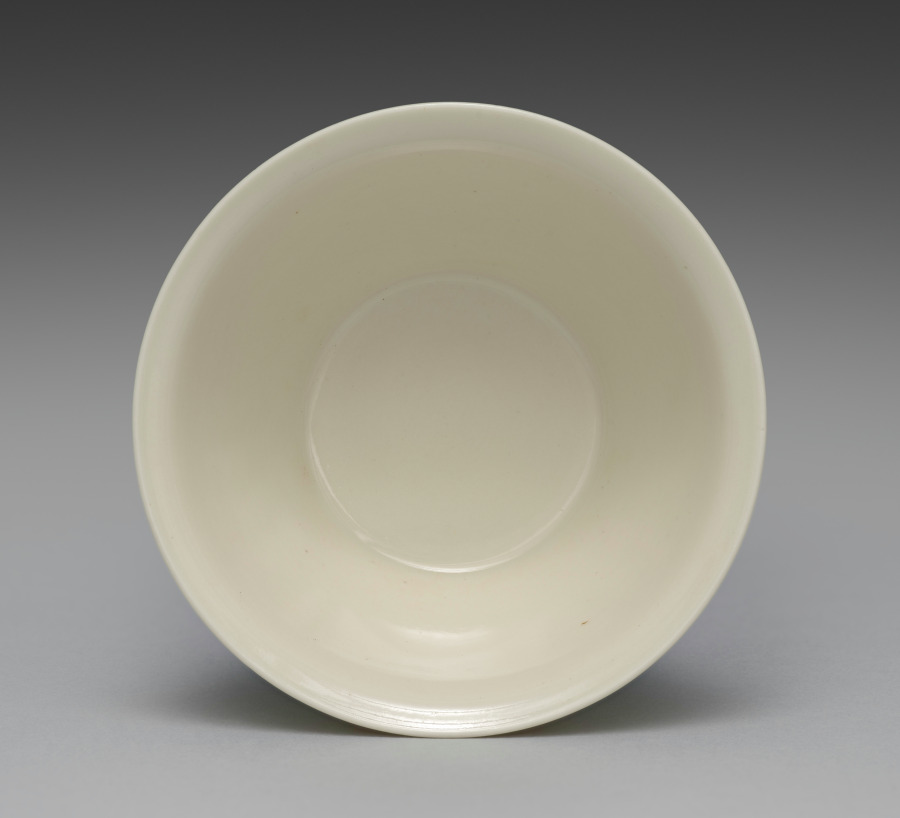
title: Teacup from Teacups with Floral Band Motif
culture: Japan, Meiji period (1868–1912)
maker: Seifū Yohei III (Japanese, 1851–1914)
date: 1893–1914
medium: One from a set of five cups; porcelain with incised decoration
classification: Ceramic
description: The five sencha teacups in this set are decorated with incised flowers and dots between a double band at the top and a single band at the bottom. They are in Yohei III’s creamy taihakuji body and glaze. In their motifs, they are quite similar to an incense burner by Yohei III (see CMA 2022.180), but the flowers are even more simple in design, with no open circle at the center. A label affixed to the side of the box refers to them as “sencha cups in emulation of Korean white [ware].” The reference to Korean ware indicates that even though Yohei was more directly inspired by Qing-dynasty wares from the Dehua kilns in Fujian Province in developing his porcelain clay and glaze for works such as these, the general understanding of the continental models still placed them, at least in terms of color, among pieces broadly associated in Japan with Korean white wares. The delicate cups are thinly potted, so they have a highly desirable translucency.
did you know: The delicate cups in this set are thinly potted, so they have a highly desirable translucency.